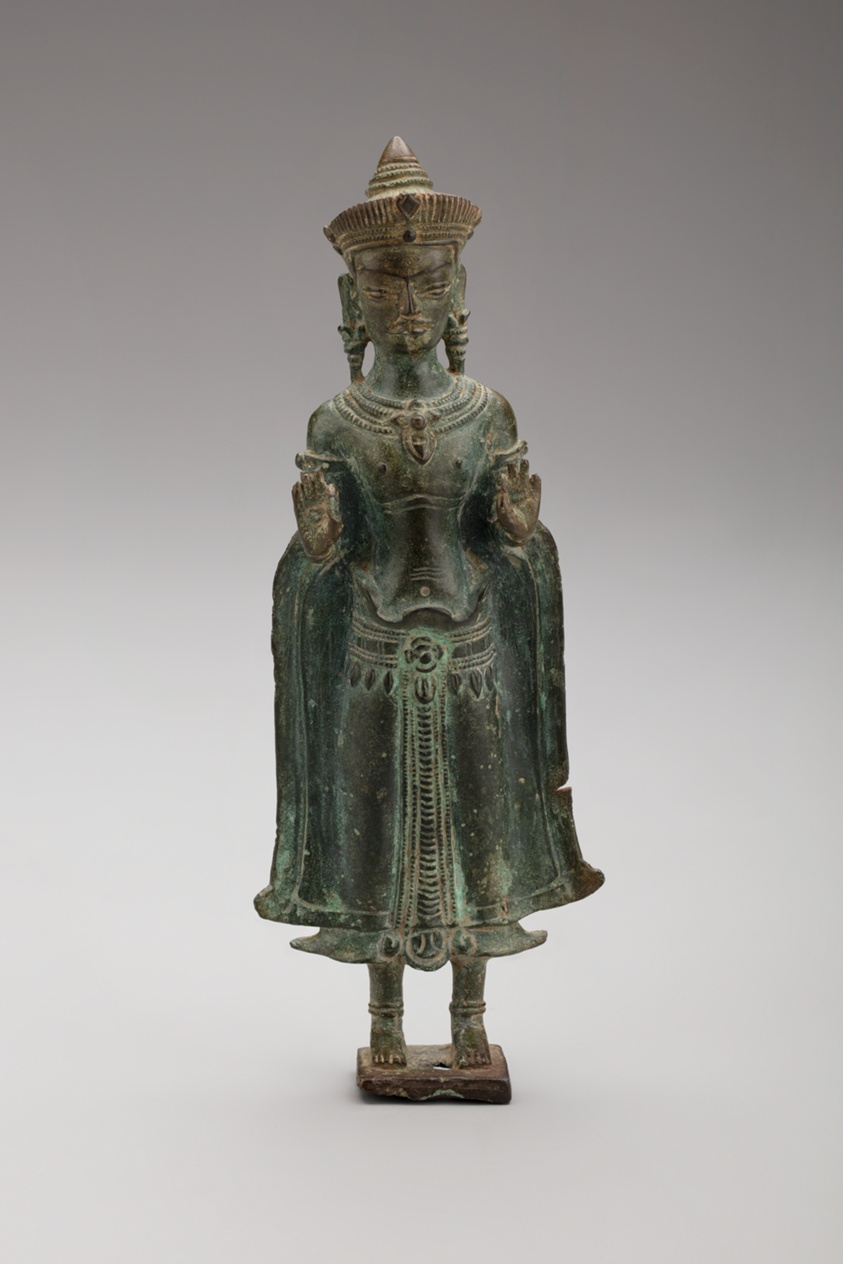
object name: Sculpture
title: Crowned Buddha with Hands in Gesture of Teaching <em>(Vitarkamudra)</em>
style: Southeast Asian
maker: Thailand or Cambodia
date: Angkor period, 12th century or later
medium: Bronze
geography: Thailand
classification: bronze; asian art; sculpture